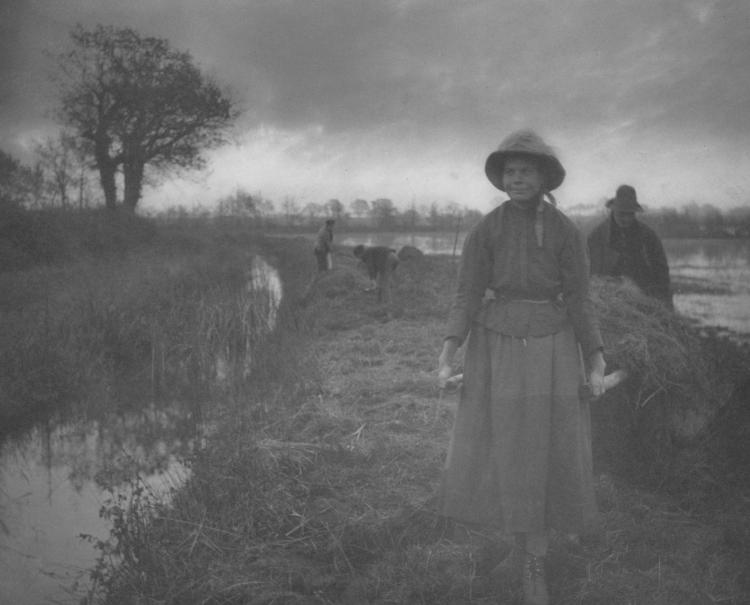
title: Poling the Marsh Hay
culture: England, 19th century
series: Life and Landscape on the Norfolk Broads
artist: Peter Henry Emerson (British, 1856–1936)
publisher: Sampson Low, Marston, Searle, and Rivington [with T. F. Goodall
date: 1886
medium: platinum print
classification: Photograph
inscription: Written in pencil on verso: "MFAH AOP EXH# 154"; on recto: "L1194"